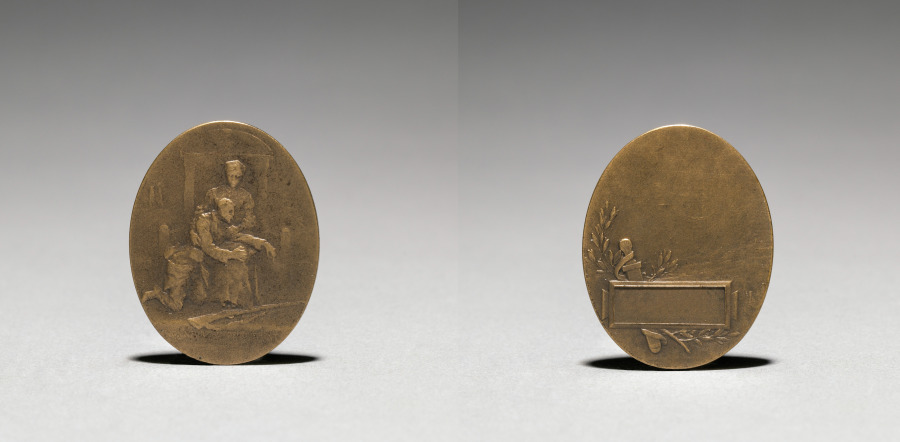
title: Medallion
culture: France, 19th-20th century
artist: Jean Paul Aube (French, 1837–1916)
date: 1915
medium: bronze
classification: Metalwork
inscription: "Honneur au devouement" (honor to self sacrifice); inscribed: "P. Aube."